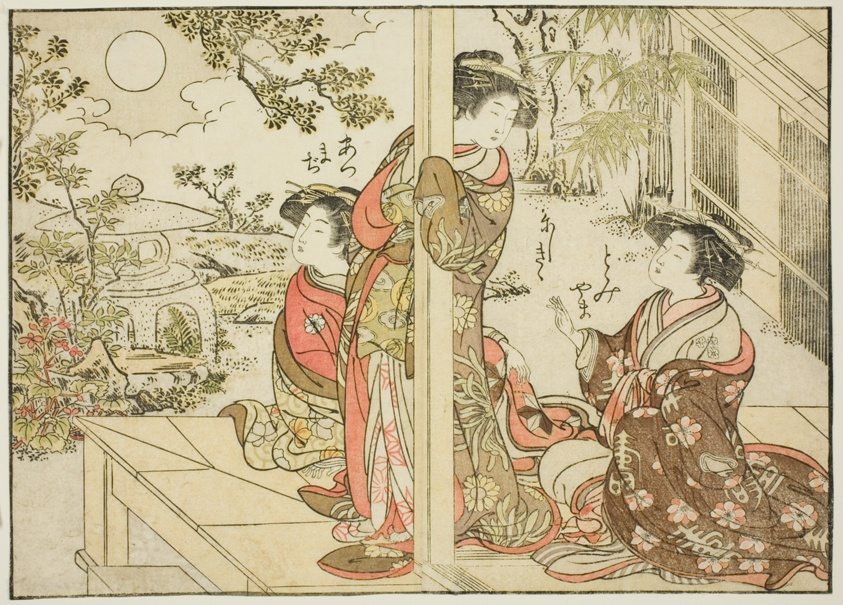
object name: Print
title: Courtesans of Yotsumaya, from the book "Mirror of Beautiful Women of the Pleasure Quarters (Seiro bijin awase sugata kagami)," vol. 2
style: Japanese (culture or style)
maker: Katsukawa Shunsho; Japanese, 1726-1792; Kitao Shigemasa; Japanese, 1739-1820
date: 1776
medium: Color woodblock print; double-page illustration cut from a book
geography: Japan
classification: woodblock print; print; asian art